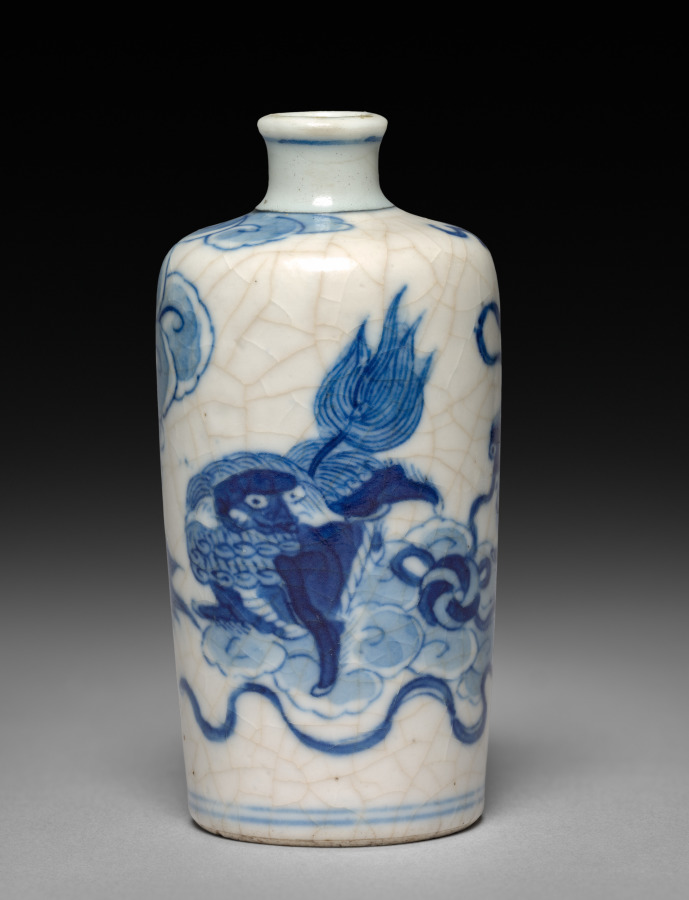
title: Snuff Bottle with Stopper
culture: China, Jiangxi Province, Jingdezhen kilns, Qing dynasty (1644–1911), Yongzheng reign (1722–35)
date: 1723–35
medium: porcelain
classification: Ceramic